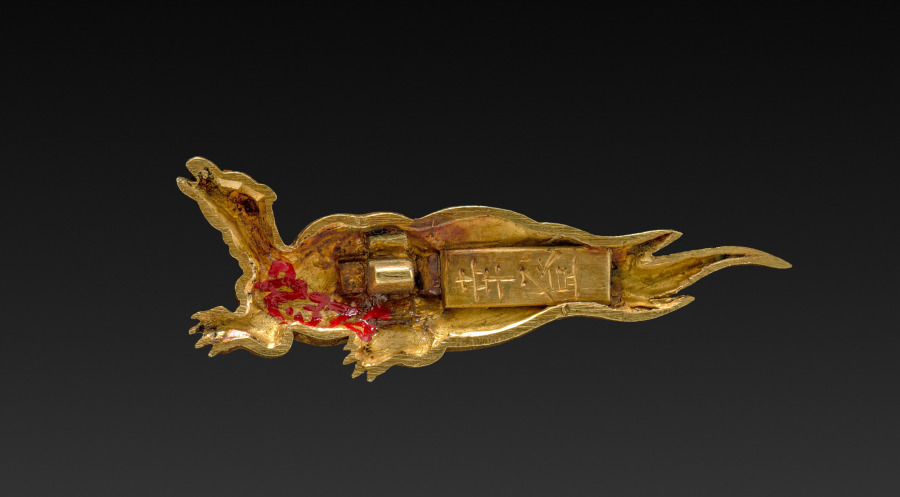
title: Tortoise-shaped Sword-Grip Ornament (Menuki)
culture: Japan, possibly Edo period (1615-1868)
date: c. 1615–1868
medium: gilt bronze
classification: Metalwork